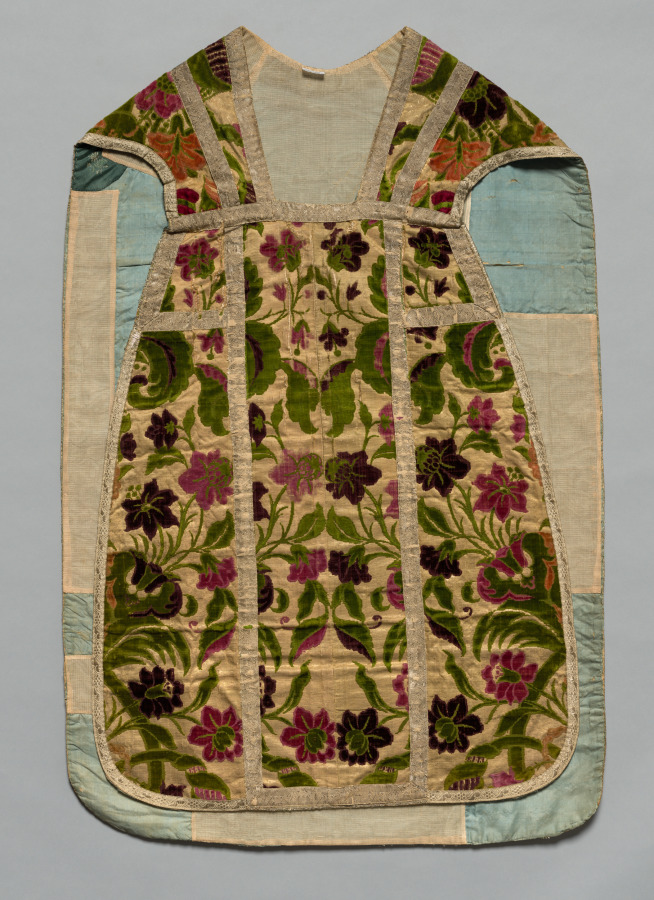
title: Chasuble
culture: Italy, Genoa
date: c 1600–1700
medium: Silk and gilt metal threads, woven; cut and uncut velvet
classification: Velvet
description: This sumptuous polychrome velvet displays a central vase with abundant flora and exotic leaves flanking curving blossoming fronds on a gilt-metal thread ground. The pattern was created with five colors of cut and uncut (loops) velvet pile. Only the pile warps for the lush green velvet occur across the entire cloth, while each additional color appears in vertical stripes—crimson, peach, rose, and purple. These widely acclaimed velvets from Genoa were the most colorful woven in Europe. Both the long stole and the shorter maniple are insignia of the office of deacons, priests, and the higher clergy. The stole was worn under a chasuble according to the office and the maniple was hung on the left forearm. The burse is a stiff receptacle in which the folded corporal, a white linen cloth on which the sacred bread and chalice are placed during the Mass, is carried to and from the altar. The upper fabric matches the chasuble, the bottom is a plain silk, and the interior has an obligatory linen lining.